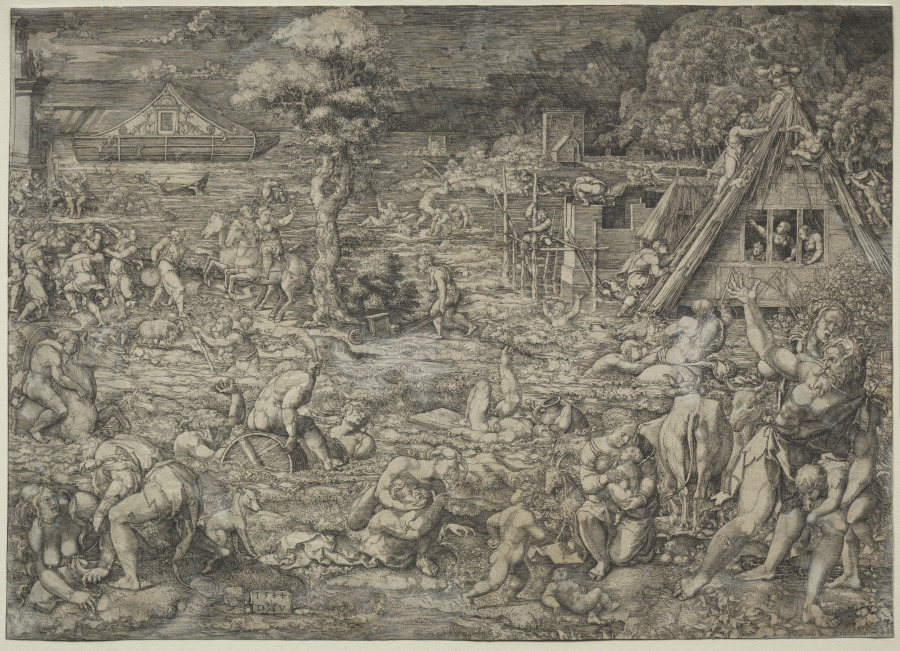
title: The Deluge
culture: Netherlands, 16th century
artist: Dirk Vellert (Netherlandish, 1480/85–1547)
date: 1544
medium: engraving and etching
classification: Print